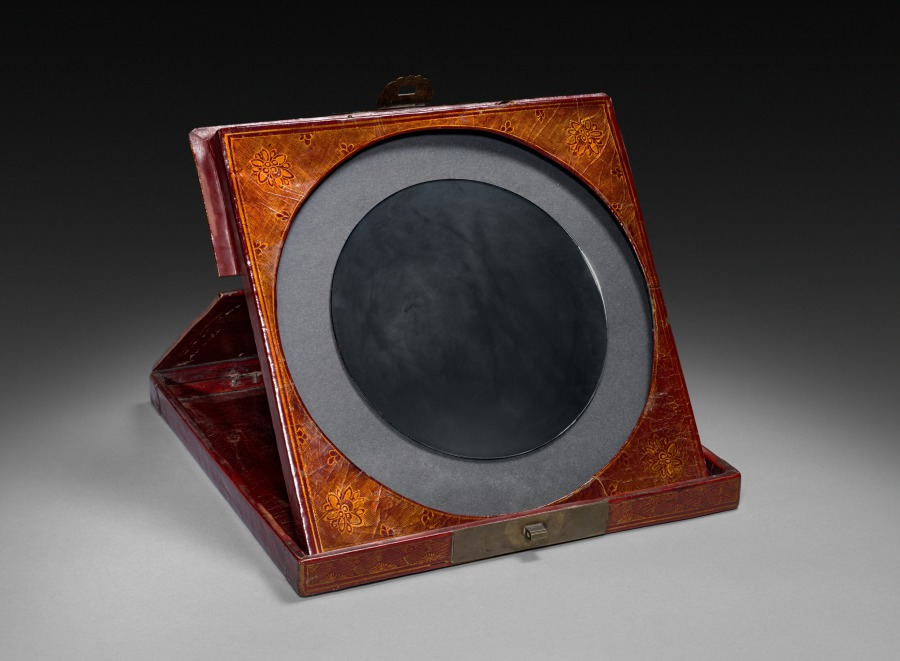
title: Mirror in a Lacquer Case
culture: China, Qing dynasty (1644-1911)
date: c. 1800–1825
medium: lacquered paper; glass mirror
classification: Lacquer